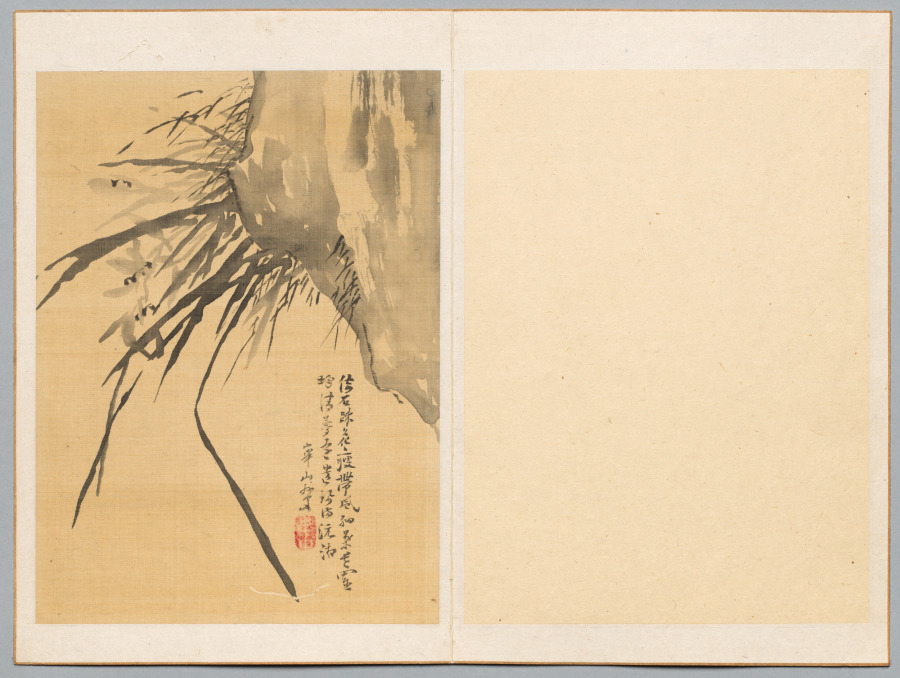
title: Orchid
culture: Japan, Edo period (1615–1868)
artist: Watanabe Kazan (Japanese, 1793–1841)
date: early to mid-1800s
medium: leaf from a pair of folding albums; ink and light color on paper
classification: Portfolio